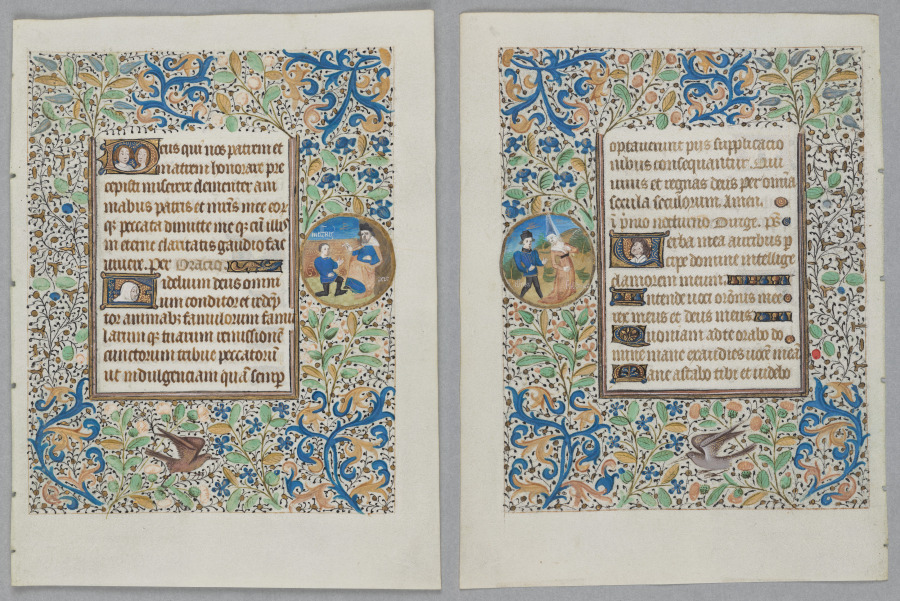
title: Leaf from a Book of Hours: Office of the Dead Opening Prayers (recto); Psalm 5 (verso)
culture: France, Paris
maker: circle of Coëtivy Master (French)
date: c. 1460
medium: Ink, tempera and gold on vellum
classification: Manuscript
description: The leaf shows the life of St Alexis, a monk of the 300s. His veneration became popular in France since the 1100s when the French poem la Vie de saint Alexis was written. This text is regarded as one of the earliest examples in romance language written in French and not in Latin.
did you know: St. Alexis is depicted here as a courtly person of the 1400s to bring him close to the reader.